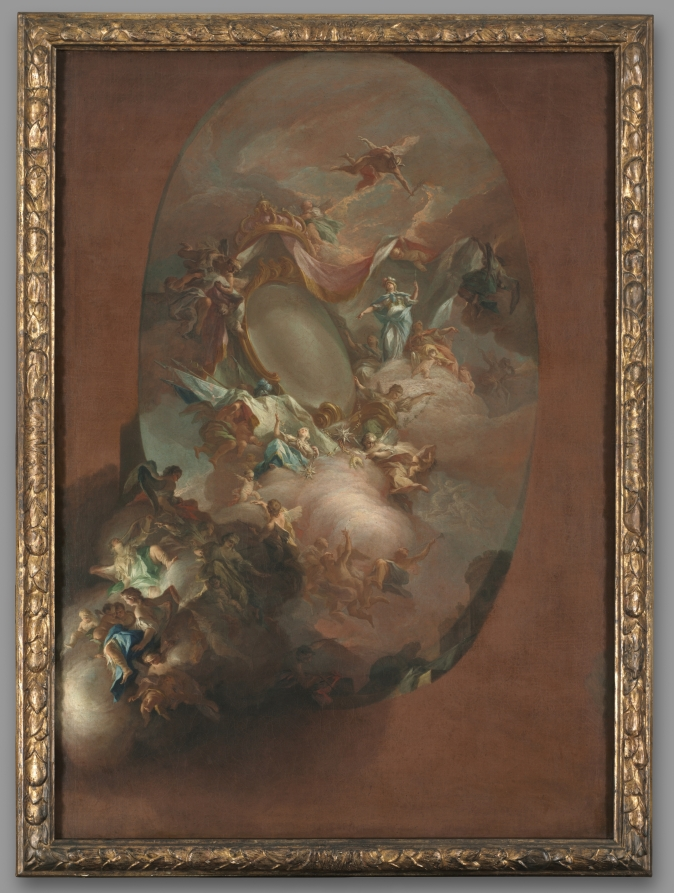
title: Study for "The Apotheosis of Ferdinand IV and Maria Carolina, King and Queen of Naples" (for the Palazzo dei Regi Studi, Naples)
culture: Italy, 18th century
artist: Pietro Bardellino (Italian, 1728–1810)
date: c. 1781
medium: oil on canvas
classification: Painting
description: This large oil painting was thought to be an early, rough sketch for the ceiling of the Salone de Biblioteca Antica in the Palazzo degli Studi in Naples. The attribution to Bardellino was based on the sketch's similarity to another sketch by the artist, sold in New York in 1972, which is more closely related to the ceiling painting. It is assumed that the Cleveland work preceded the more finished oil sketch and that both models were created in preparation for the Palazzo degli Studi's Apotheosis, completed in 1781. The Cleveland sketch was almost completely altered in the final composition. The cartouche, or grouping of regal paraphernalia, which is the main feature of the Cleveland sketch, was omitted in the final ceiling painting. This medallion conveys the idea that the reign of the royal couple is filled with fortune. Bardellino used atmospheric colors and his delicate touch in this heavenly vision of angels and virtues, and the angels hold a chain bearing the orders of the royal family. From left to right are the Order of San Januarius, the Order of the Holy Spirit of France, the Order of the Golden Fleece (represented by the lamb), and the Order of St. George of Constantine. The large oval shape, empty in the Cleveland sketch, also appears in the final version, where the oval is smaller and frames a portrait of Ferdinand and Maria. Rather than representing an apotheosis of the bodies of the royal couple, Bardellino shows their ascent in the raising of their portraits to heaven. While the Palazzo degli Studi painting differs greatly from the Cleveland version, the oval space in the Cleveland sketch suggests Bardellino's plans for the inclusion of the royal portrait in the final ceiling painting.